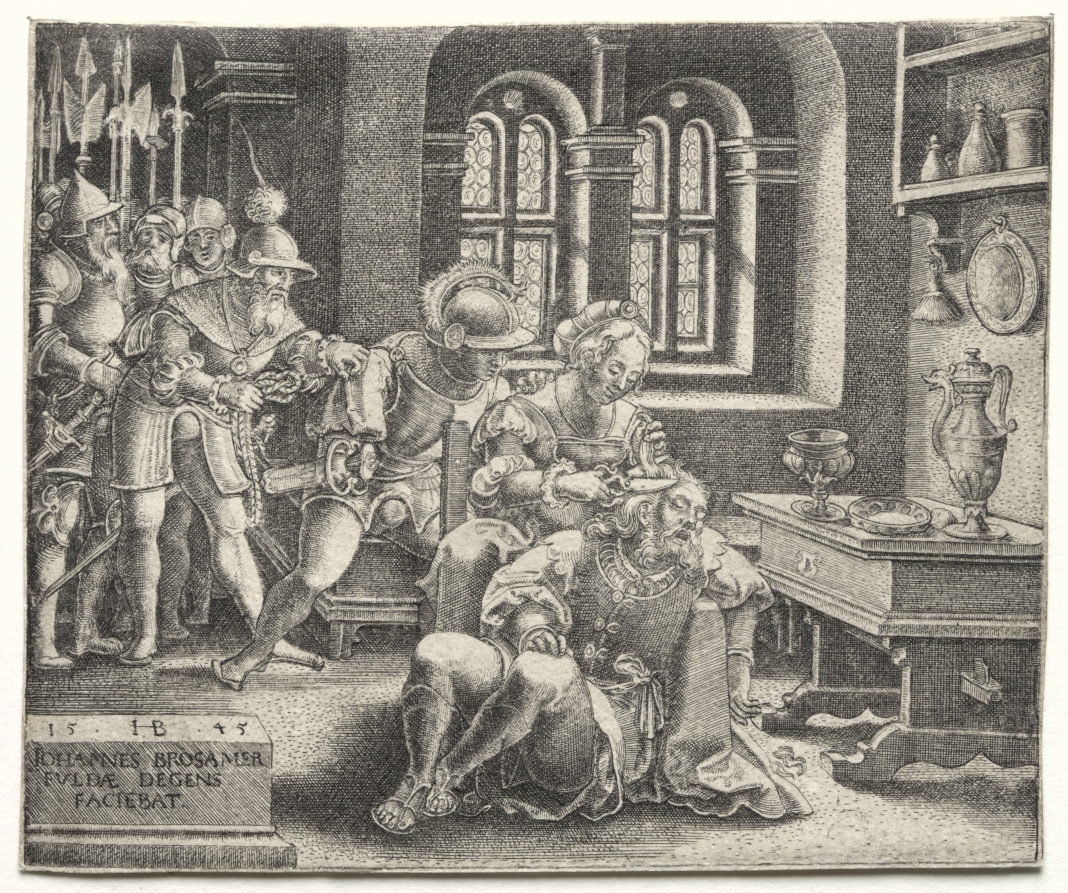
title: Samson and Delilah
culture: Germany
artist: Hans Brosamer (German, c. 1500–1554)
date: 1545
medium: engraving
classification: Print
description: Samson was a man of immense strength and a Nazarite, an Israelite who took a pious oath not to cut his hair or drink alcohol. Bribed by the Philistines (enemies of the Israelites), Delilah—Samson’s lover—cut his hair after discovering that it was the source of his strength. In Hans Brosamer’s rendition, Samson has fallen asleep on Delilah’s lap as she cuts his hair while the Philistines enter. A large chalice and ewer nearby reveal the role of wine in his slumber. Hans Burgkmair I similarly emphasized the importance of wine to the plot with a single beaker. The story was popular in Protestant Northern Europe, where it was understood as a cautionary tale about the dangers of temptation and neglecting one’s spiritual commitments.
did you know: Samson's sandals may be intended to signal his status as an ancient warrior, but with the exception of Samson's footwear, Samson and Delilah are dressed like 16th-century Europeans.